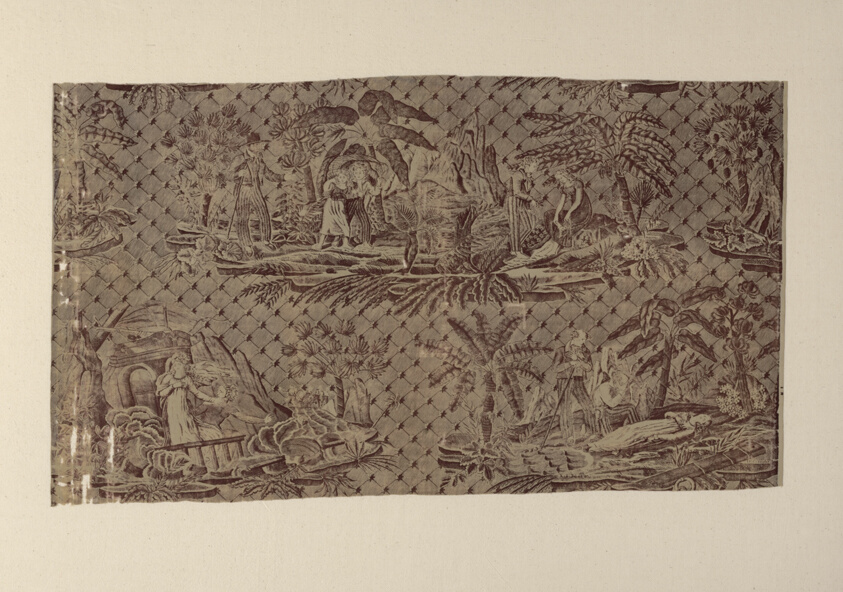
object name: Textile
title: “Paul and Virginie” Furnishing Fabric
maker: Designed by Cornelis (French, active c. 1820) after Jean Michel Moreau, the Younger (French, 1741-1814) and others; Manufactured by Hartmann et Fils (French, founded 1776); Based on the story by Bernardin de Saint-Pierre (French, 1737-1814); France, possibly Münster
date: after 1818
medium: Cotton, plain weave; engraved roller printed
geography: France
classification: weaving - printed; textile; furnishing textile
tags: people, trees, diamond shapes